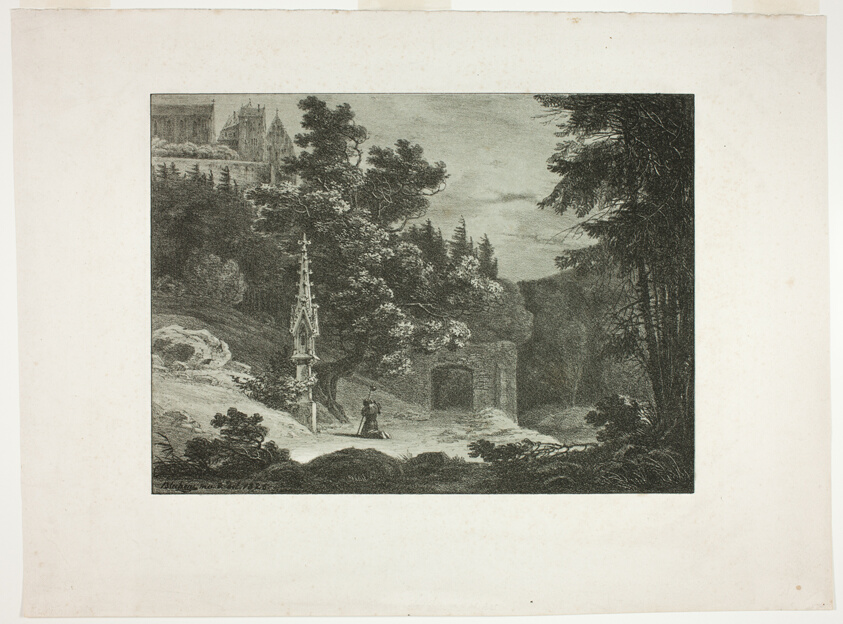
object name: Print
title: Pilgrim in the Woods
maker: Carl Blechen (German, 1798–1840)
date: 1825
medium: Lithograph in black and blue on cream wove paper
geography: Germany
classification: lithograph; print; prints and drawing